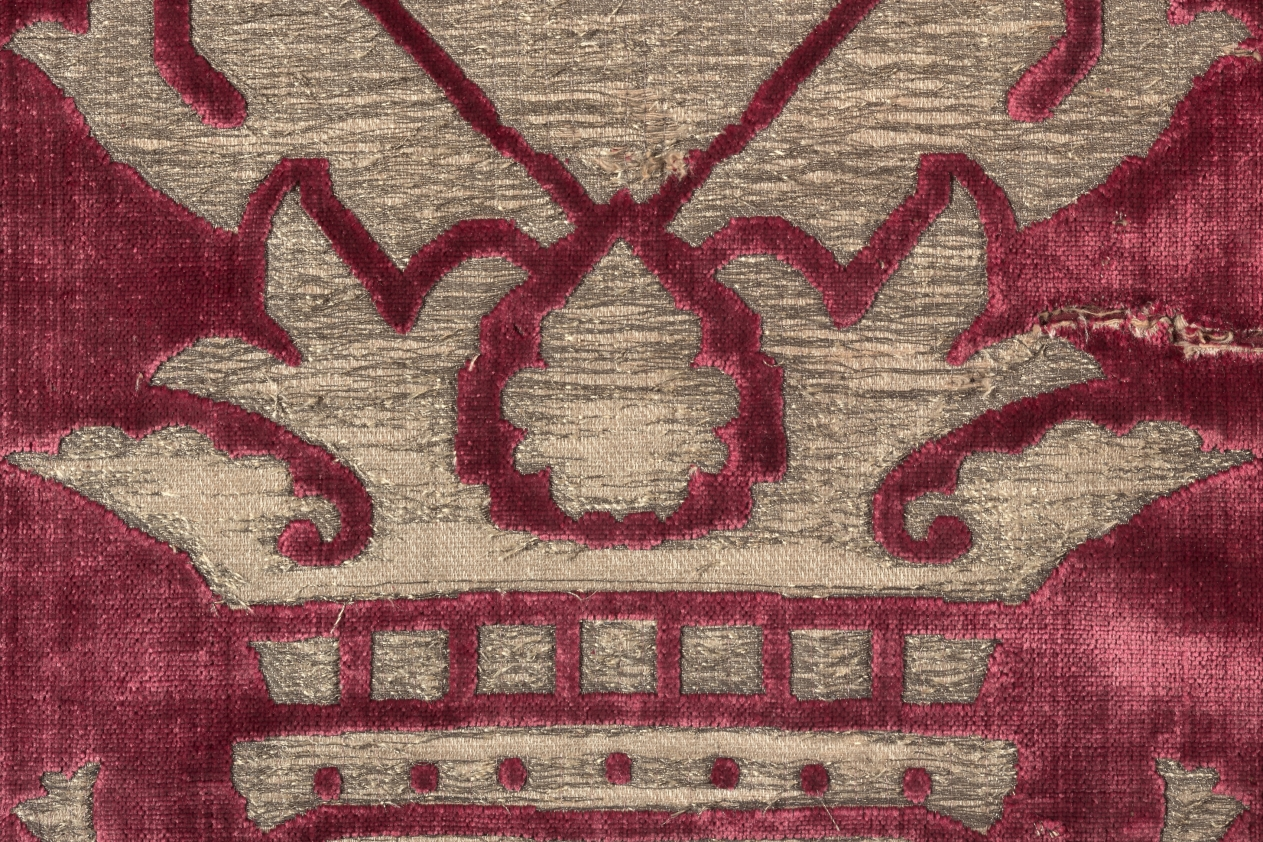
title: Brocaded Velvet Panel with Italianate Pattern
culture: Turkey, Istanbul or Bursa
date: 1575–1625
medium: Silk: velvet, brocaded; gilt-metal thread and cotton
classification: Velvet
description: Rarely are four fabric widths preserved together from any culture. This gilt-metal thread pattern combines Turkish and Italian features: the large ogival (curved) lattice clasped by crowns and the velvet structure are Turkish, and the two so-called artichoke designs are enlarged adaptations of Italian motifs. A symbol of wealth and power, this velvet panel was woven during the artistic height of the Ottoman Empire in the late 1500s. It may have covered a divan (sofa) or possibly enhanced a wall during cold winters in the imperial Topkapi Palace in Istanbul.